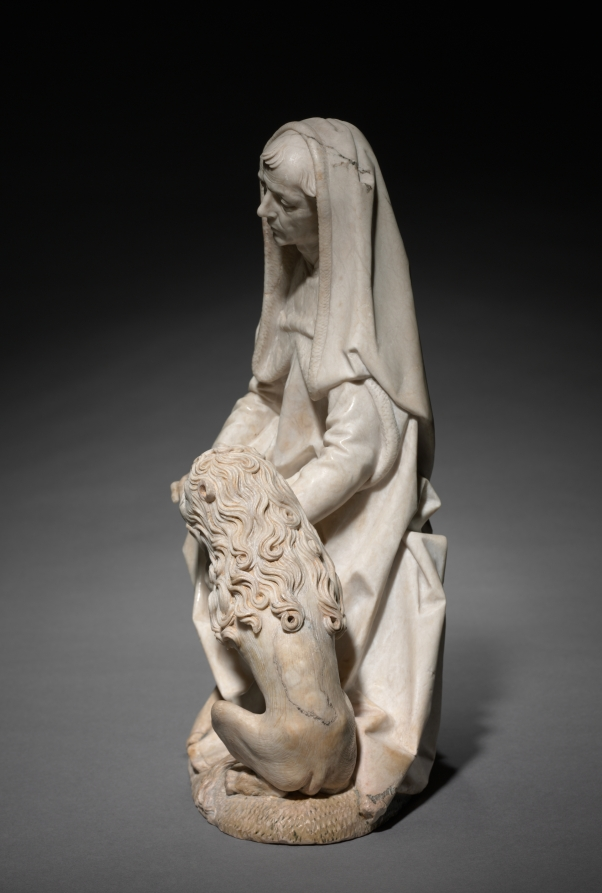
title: Saint Jerome and the Lion (From the former Church of St. Peter in Erfurt)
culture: Germany, Würzburg, late 15th Century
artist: Tilman Riemenschneider (German, active Würzburg, c. 1460–1531)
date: c. 1495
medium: alabaster, traces of polychromy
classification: Sculpture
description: According to legend, Saint Jerome (347–420 bce) lived in the desert, where he removed a thorn from an injured lion. Jerome is venerated in the Catholic Church as a Church Father, an important early author of Christianity. Here, he wears cardinal’s clothing from around 1500. Tilman Riemenschneider focused on Jerome’s relationship with the lion, creating empathy for the wounded animal. The delicacy of the depiction, which may have been partially painted to add highlights, is typical of alabaster, as is its fine polishing. The cord of the cardinal’s hat, missing today, may have been supplemented from another material.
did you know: In the story Saint Jerome encounters a fearsome lion, here depicted as diminutive, gentle, and submissive.